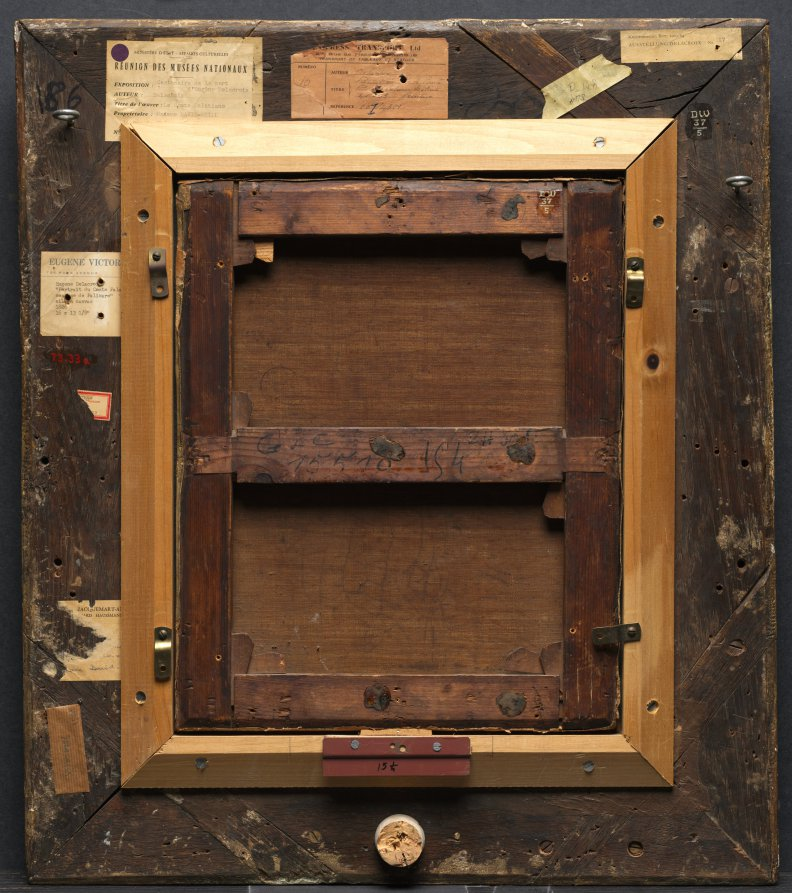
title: Count Demetrius de Palatiano in Suliot Costume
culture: France, 19th century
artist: imitator of Eugène Delacroix (French, 1798–1863)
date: not dated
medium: oil on fabric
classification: Painting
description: The Greek war of independence in the 1820s was a source of great interest for the rest of Europe. The exotic costumes of Greek soldiers, or Palikares, were popular subjects for artists. Count Palatiano was a flamboyant Greek aristocrat who often posed for Delacroix and his colleagues in Paris.